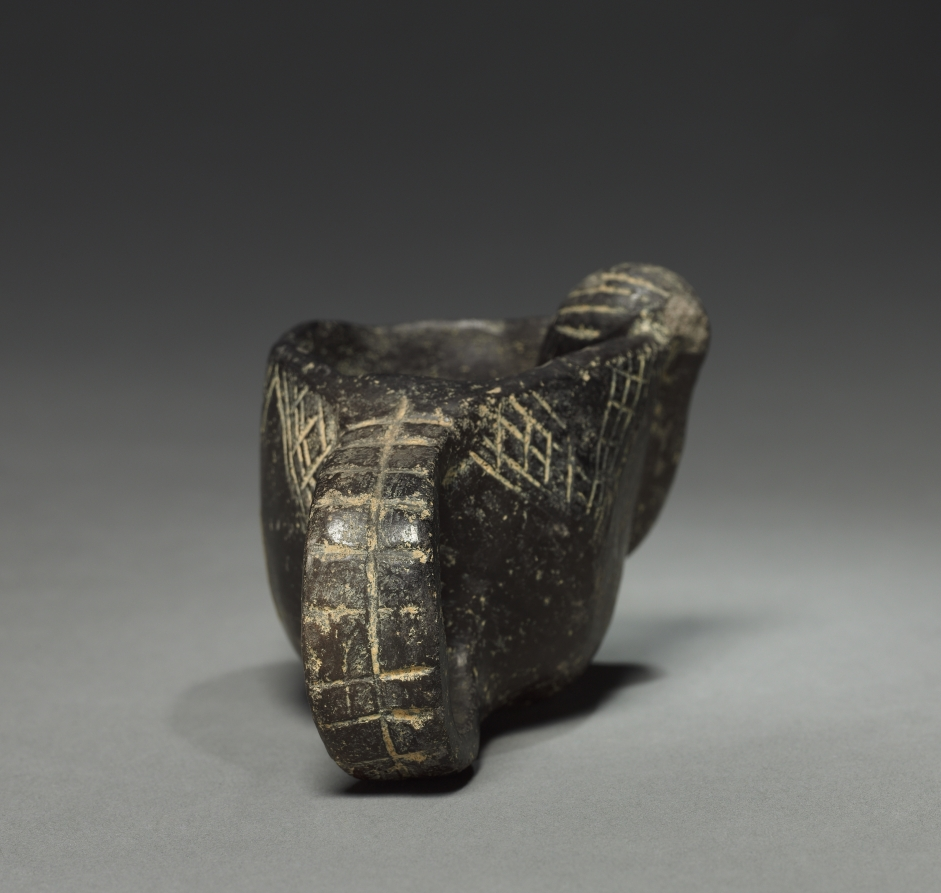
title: Dish with Handle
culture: Colombia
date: before 1921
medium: pottery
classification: Ceramic